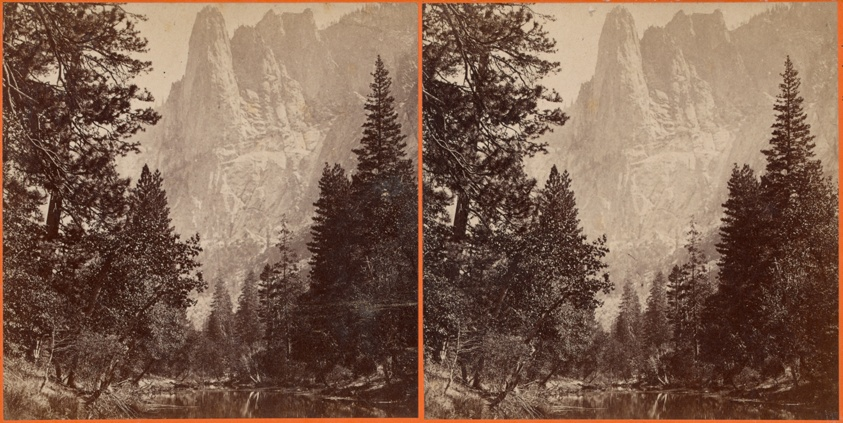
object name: Photograph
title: The Sentinel, 3270 feet, Yosemite Valley, Mariposa County, Cal., No. 65 from the series "Watkins' Pacific Coast"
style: 19th century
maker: Carleton E. Watkins; American, 1829-1916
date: 1861/76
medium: Albumen print, stereo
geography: United States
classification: stereograph (albumen); albumen silver print; photographic process; photography; photograph